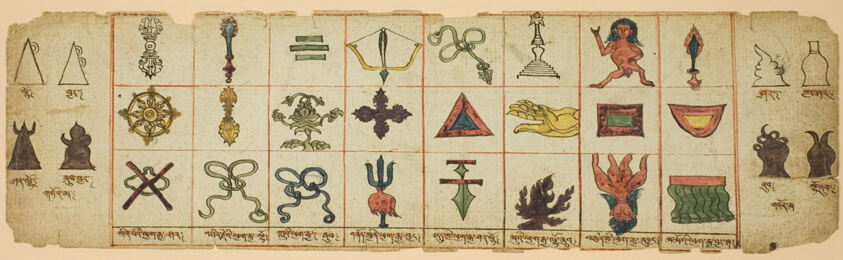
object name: Painting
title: Page from a Notebook with Ritual Symbols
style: Himalayan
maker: Mongolia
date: 19th–20th century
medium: Ink and opaque watercolor on paper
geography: Mongolia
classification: pen and ink drawings; manuscript; asian art; painting